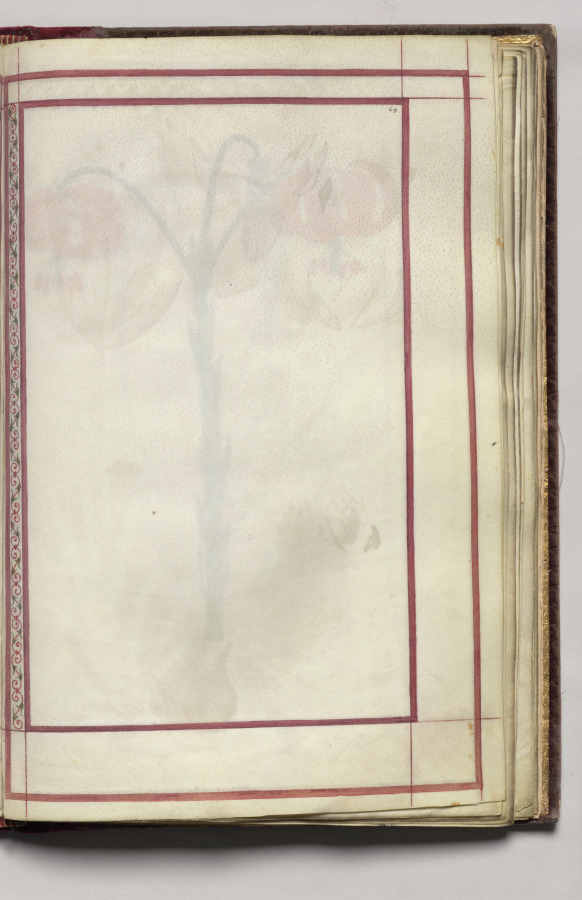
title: Border, folio 32 (recto), from Florilegium (A Book of Flower Studies)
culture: France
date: 1608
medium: watercolor, ink, silver and gold over occasional traces of pencil, on vellum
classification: Bound Volume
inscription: Dated: Poitiers 1608 (on frontispiece) Signed: On frontispiece in black ink, lower right: Van Kuyk Notation on drawing: Frontispiece: in pencil, lower margin: * élève de Van Kessel, peintre flammand (* in pencil also appears in front of Van Kuyk's name).